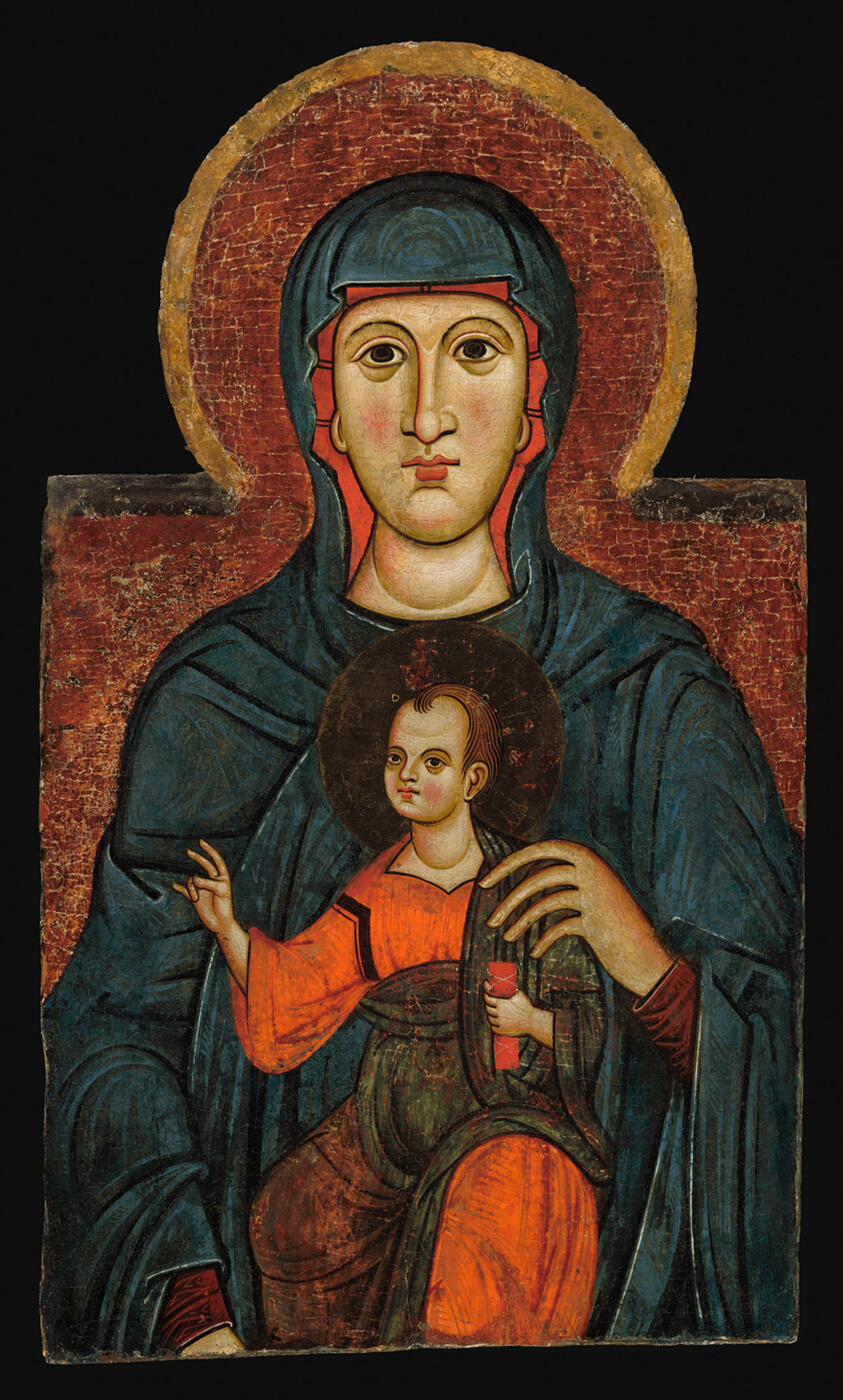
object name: Painting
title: Virgin and Child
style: 13th century, medieval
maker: Italian; Tuscany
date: c. 1270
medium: Tempera on panel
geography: Florence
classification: painting; paint; Italian; european painting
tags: Virgin and child/Madonna and child, biblical, children, Christian subjects, Christianity, religion, religious, woman, woman with children, women, Century of Progress, world's fairs, Chicago World's Fairs